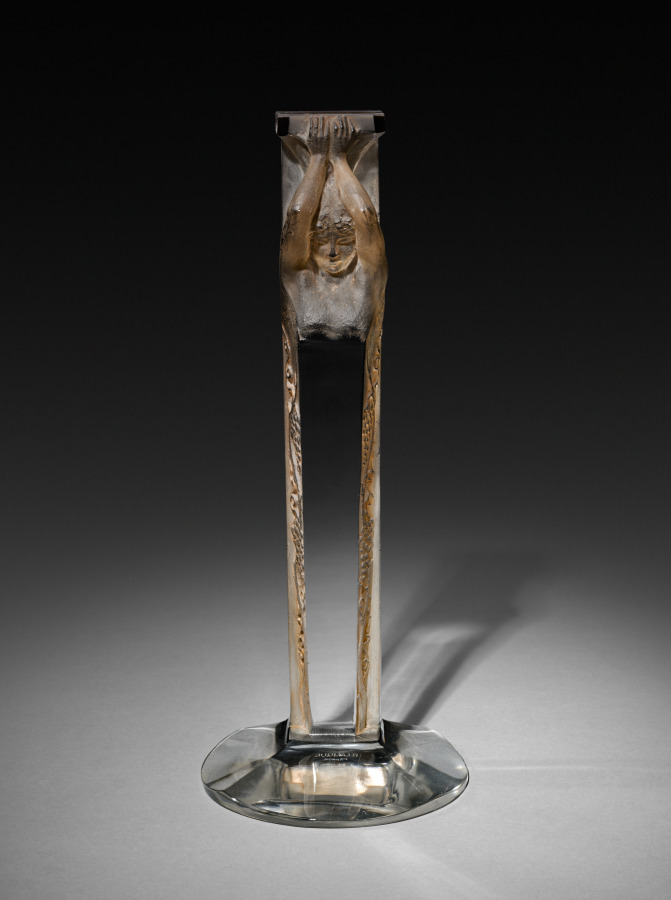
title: Bacchus Figural Centerpiece Support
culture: France, 20th century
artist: René Lalique (French, 1860–1945)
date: 1923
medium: Cast and patinated glass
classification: Glass